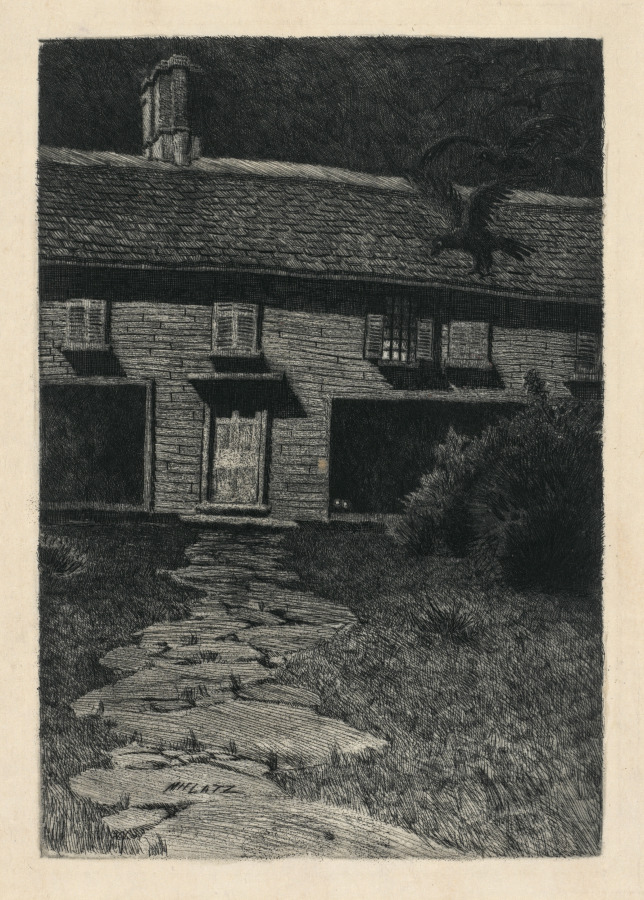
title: The Witch's House in Salem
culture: America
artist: Karl Friedrich Wilhelm Mielatz (American, 1864–1919)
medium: etching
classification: Print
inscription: lower margin, left corner, in graphite: The Witch House in Salem